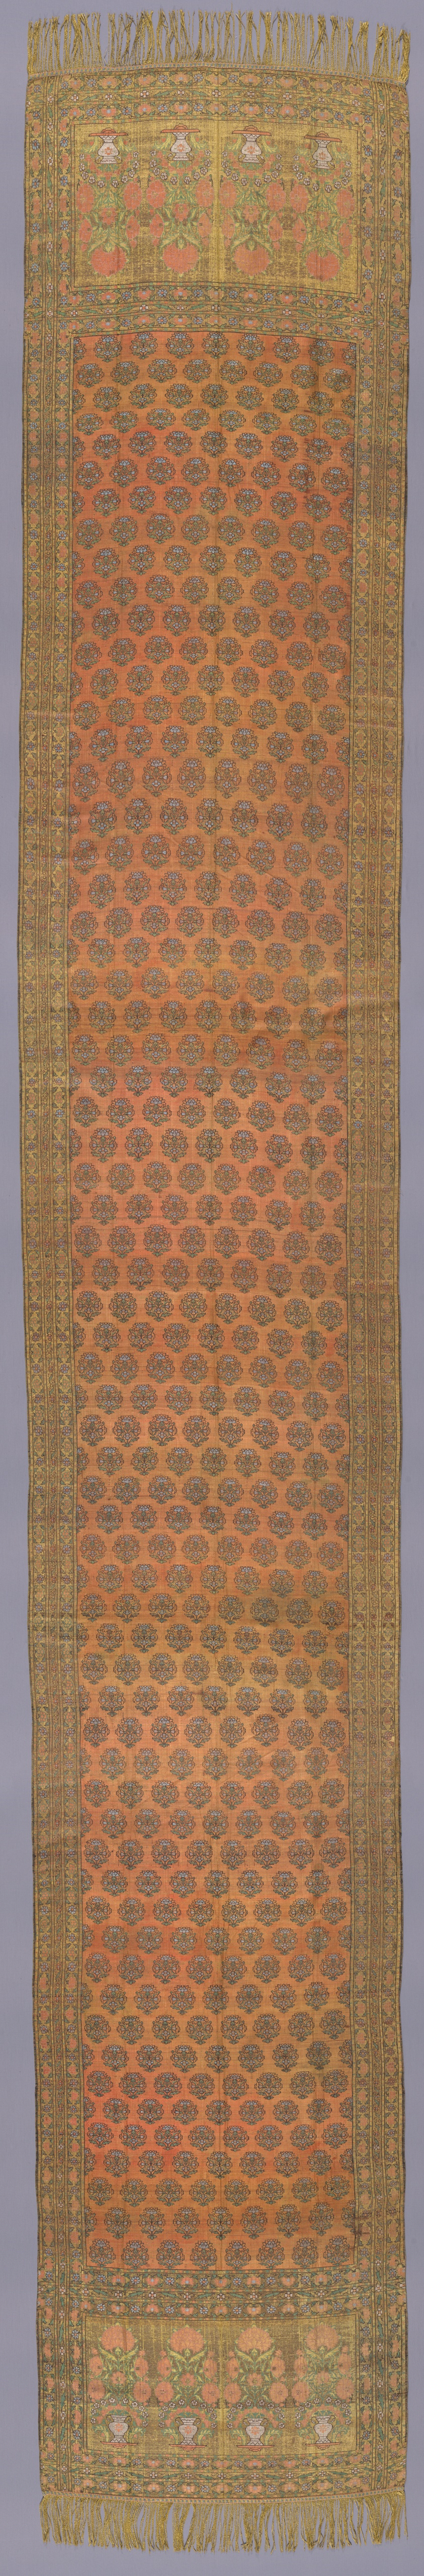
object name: Costume and Accessories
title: Man's Waist Sash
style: 18th Century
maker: Made in Iran or Poland for the Polish market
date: 18th century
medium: Silk compound weave, with applied silk and metal fringe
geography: Iran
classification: costume; weaving; dress (garment); clothing; textile; costume accessory worn at waist or below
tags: floral motifs, flowers, vase, geometric, floral, rectangles, stripes, nobility